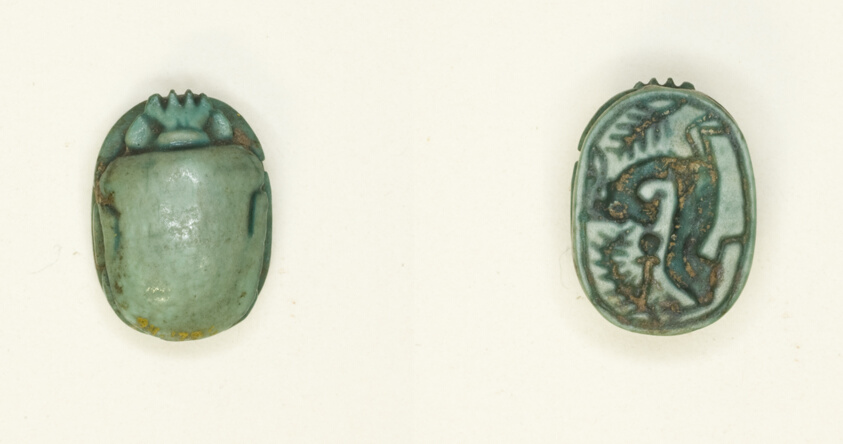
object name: Costume and Accessories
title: Scarab: Antelope with Foliage (sw.t-plant) Motif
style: second intermediate period, egyptian, ancient, new kingdom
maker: Egyptian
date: Second Intermediate Period – early New Kingdom, Dynasties 15–18 (about 1650–1295 BCE)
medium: Glazed steatite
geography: Egypt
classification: scarab; ancient art; costume; amulet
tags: scarab beetle, antelope, plants